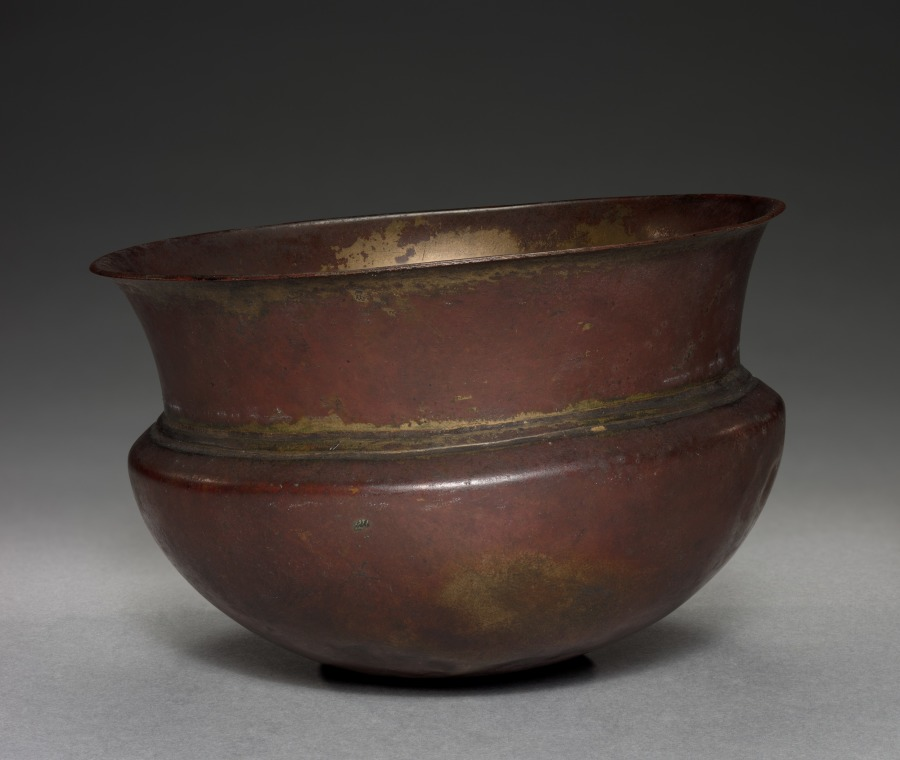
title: Deep Bowl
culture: Egypt, Greco-Roman period (332 BCE–395 CE), Ptolemaic dynasty (305–30 BCE) or modern forgery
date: 305–30 BCE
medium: bronze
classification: Vessels